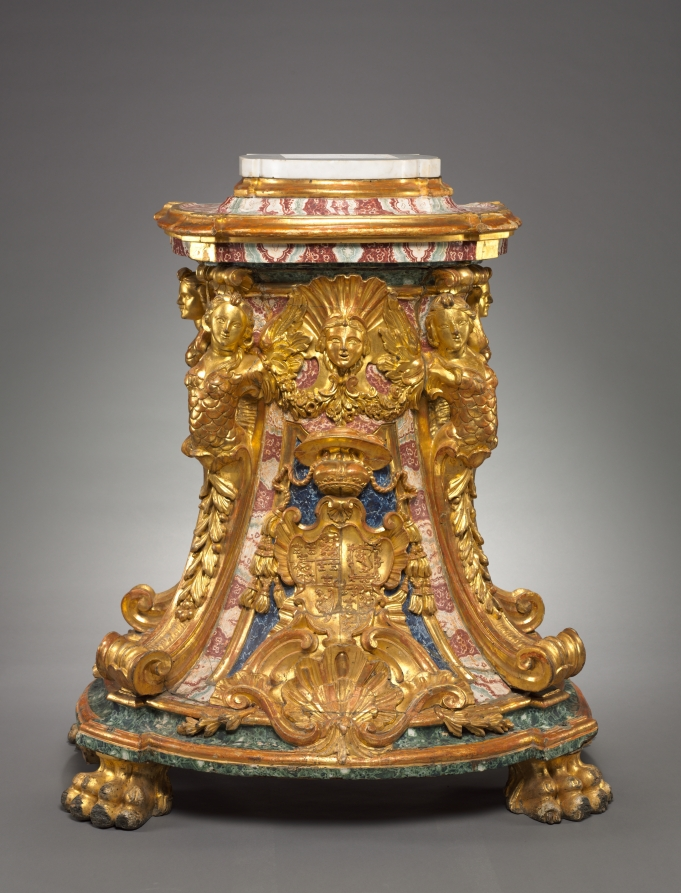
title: Pedestal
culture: Italy, Rome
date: mid-1700s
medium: carved, gilded, and painted wood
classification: Furniture and woodwork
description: The coat of arms on this pedestal is that of Cardinal York, the last of the Stuart pretenders to the British throne. He lived out his years in Rome, where he had been made a cardinal of the Church.